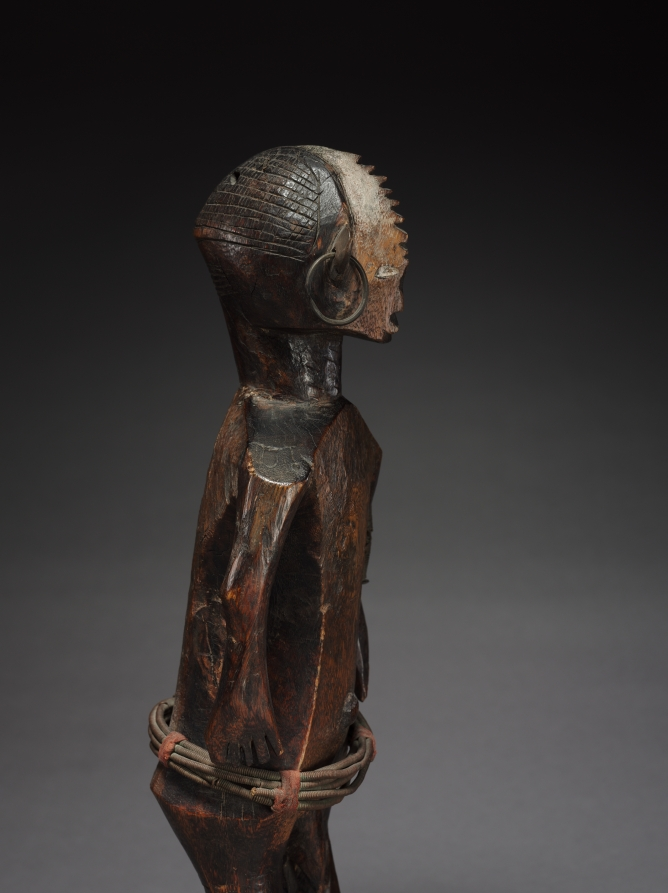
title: Male Figure of a Pair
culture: Africa, Central Africa, Democratic Republic of Congo, probably Ngbandi-style carver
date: late 1800s-early 1900s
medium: Wood, iron alloy, copper alloy, and cloth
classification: Sculpture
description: Carving of paired figures is quite well documented among the Ngbandi and its neighbors the Ngbaka-Minagende, where such sculptures are said to represent the mythical ancestor Seto and his sister-wife, Nabo. Field-based research cannot confirm the existence of figurative couples among the Ngbandi.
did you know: Odette Delenne, the collector of this pair, once stated that these figures reminded her of herself and her husband, René.